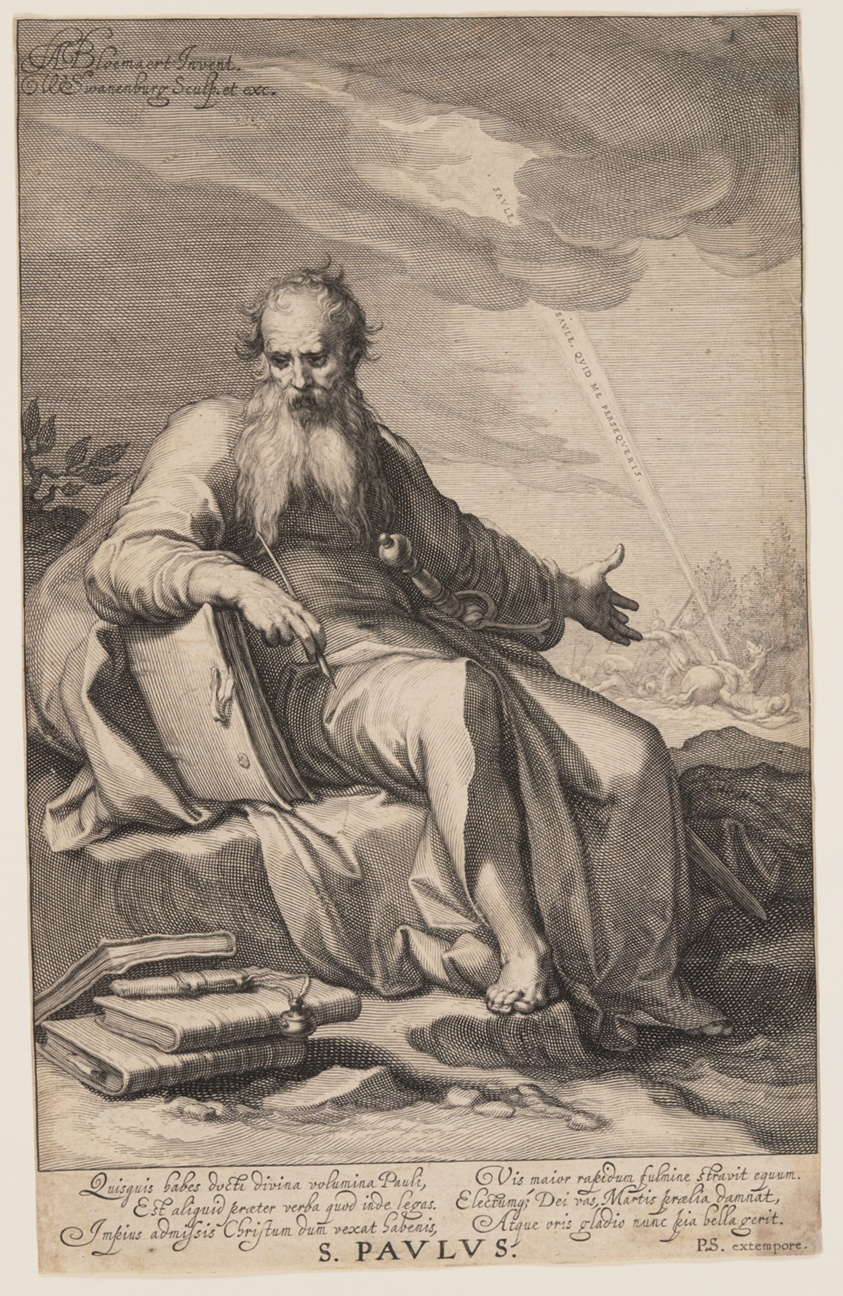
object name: Print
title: St Paulus, from Sinners of the Old and New Testament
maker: Willem van Swanenburgh (Dutch, 1580–1612); after Abraham Bloemaert (Dutch, 1566–1651)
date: c. 1609-1611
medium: Engraving on ivory laid paper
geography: Netherlands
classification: engraving; paper; print; prints and drawing